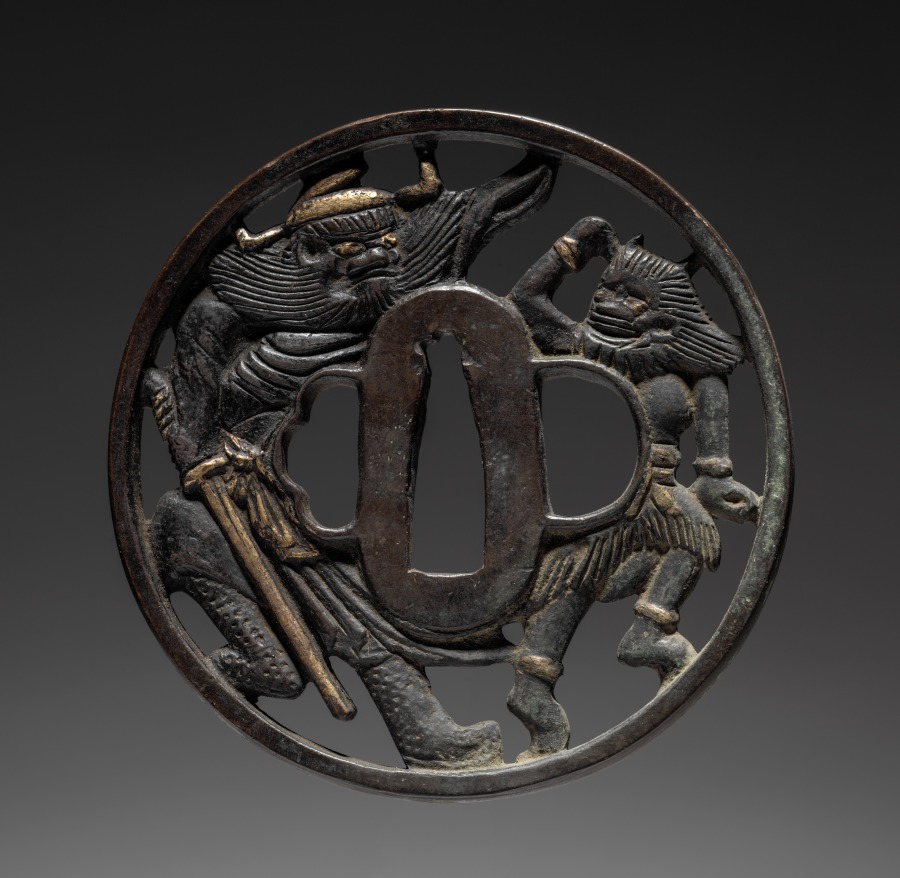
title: Sword Guard (Tsuba) with Zhong Kui (Shōki) the Demon Queller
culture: Japan, possibly Edo period (1615-1868)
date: c. 1615–1868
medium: iron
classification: Arms and Armor